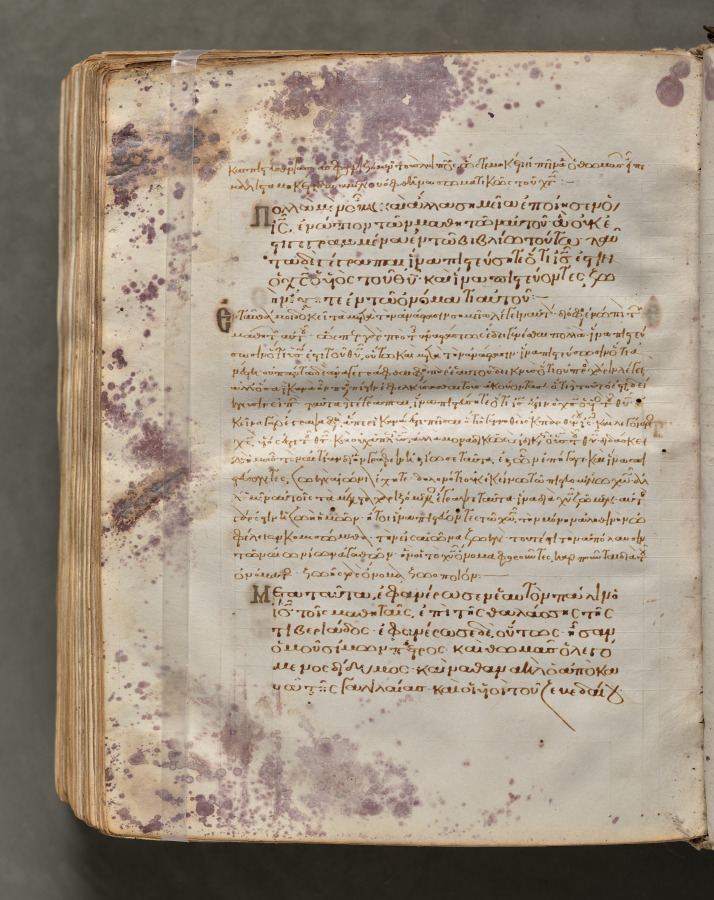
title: Text, folio 421 (verso), from a Gospel Book with Commentaries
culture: Byzantium, Constantinople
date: c. 1000–1100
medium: ink, tempera, and gold on vellum; leather binding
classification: Bound Volume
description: Each of the four gospels in this book opens on a page with brilliantly illuminated borders depicting the author of the text as well as birds—principally peacocks, symbols of the immortality of the soul—and fountains, representing the fountain of life and the salvation of the soul. This volume consists of 428 leaves with texts in Greek. Its level of sophistication suggests that it was probably written and decorated in a monastery in Constantinople.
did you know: Gospel books were carried in procession through Byzantine churches.